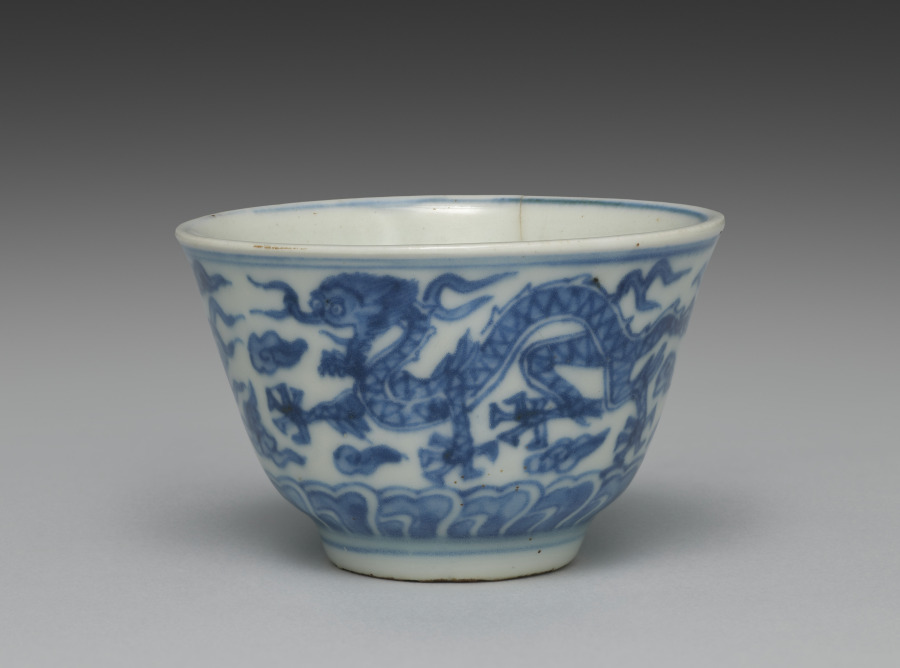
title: Cup from Tea Cups with Dragons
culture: Japan, Edo period (1615–1868)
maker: Seifū Yohei I (Japanese, 1801–1861)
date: 1840s–57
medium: One from a set of five tea cups; porcelain with underglaze blue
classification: Ceramic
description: Seifū Yohei I made both blue and white porcelains after Ming dynasty (1368–1644) Chinese wares fired in the kilns at Jingdezhen for export. He also made colorful stoneware in the style of his teacher, Nin’ami Dōhachi (Takahashi Dōhachi II) (1783–1855).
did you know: A small figure of an elephant serves as the handle for the lid.